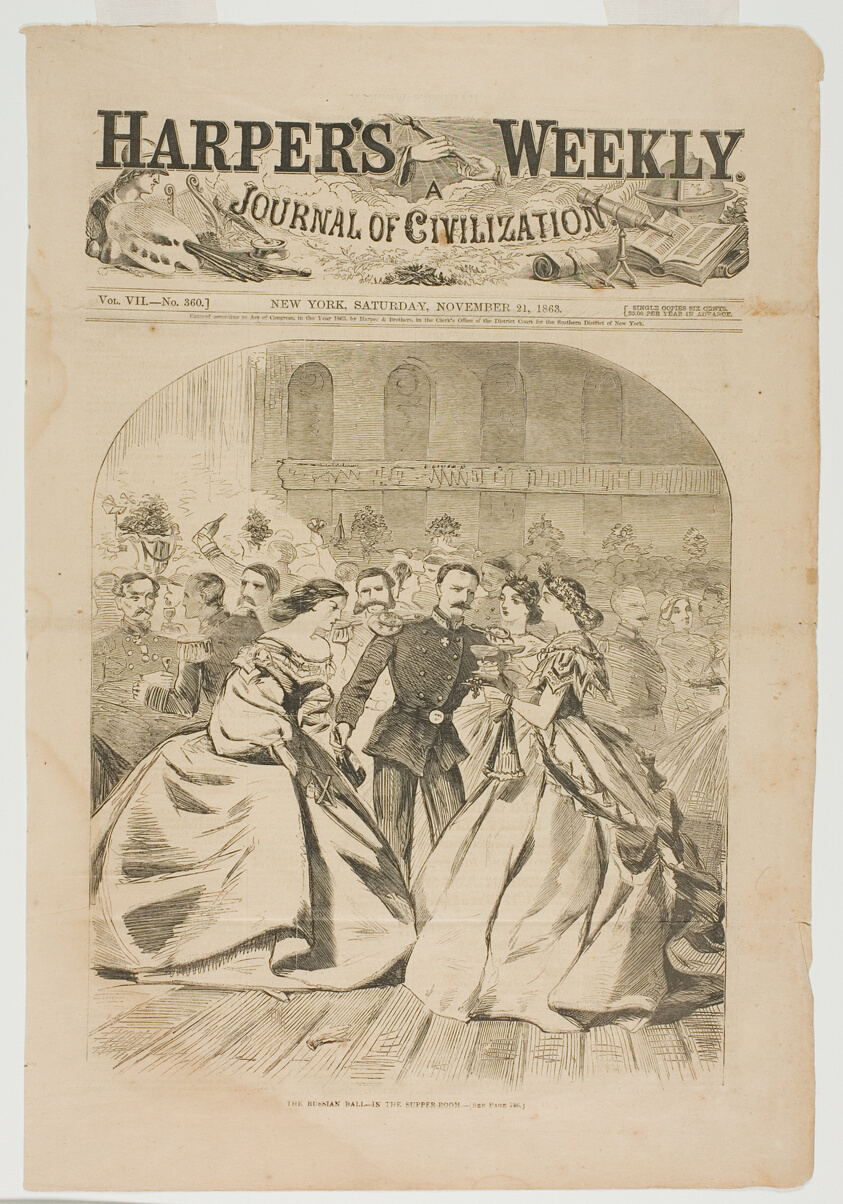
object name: Print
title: The Russian Ball—In the Supper Room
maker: Winslow Homer (American, 1836-1910); published by Harper's Weekly (American, 1857-1916)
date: published November 21, 1863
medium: Wood engraving on paper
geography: United States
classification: wood engraving; print; prints and drawing